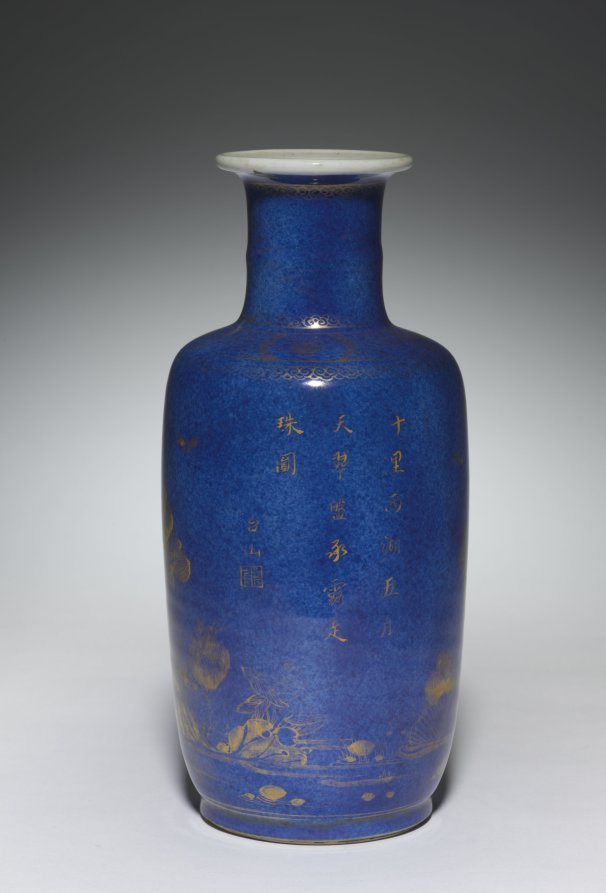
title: Vase with Lotus Plants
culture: China, Qing dynasty (1644-1911), Kangxi reign (1661-1722)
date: 1662–1722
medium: porcelain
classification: Ceramic